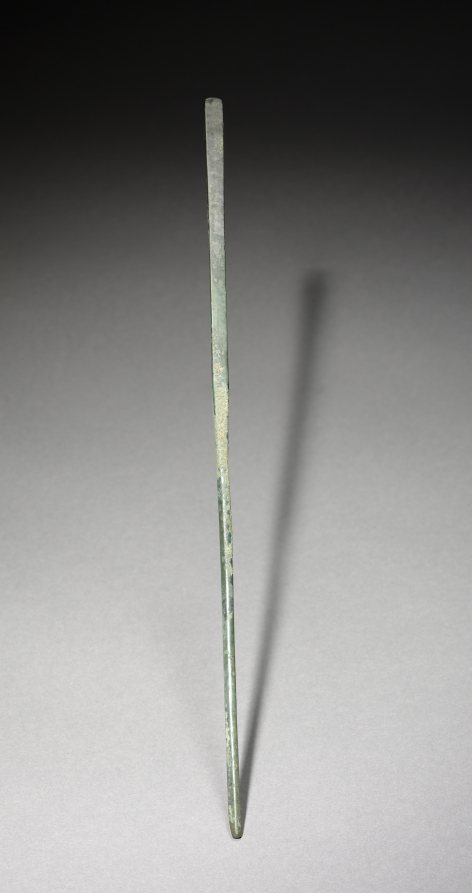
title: Chopstick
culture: Korea, Goryeo dynasty (918–1392)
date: 918–1392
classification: Metalwork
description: In Korea, chopsticks made of metal such as brass, silver, and gold were excavated from ancient tombs and ruins dated to the 6th century at the earliest. Burial goods often include utilitarian objects such as table wares and utensils because the dead were believed to need them in the afterlife.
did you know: In contrast to the Chinese and Japanese, Koreans still prefer metal chopsticks (stainless steel and brass) to wooden ones.